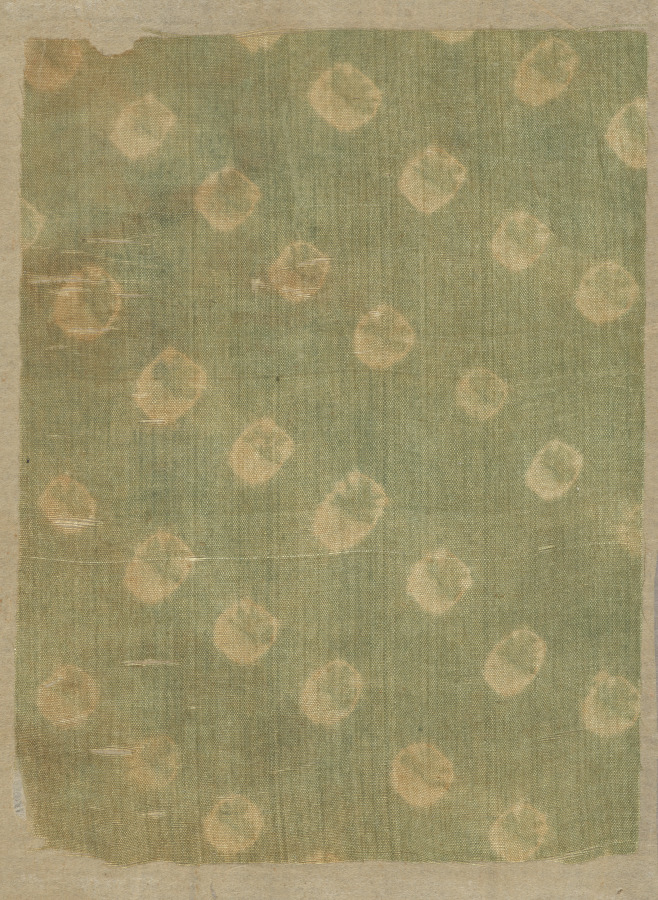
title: Fragment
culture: China or Japan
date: 700s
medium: tabby weave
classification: Textile